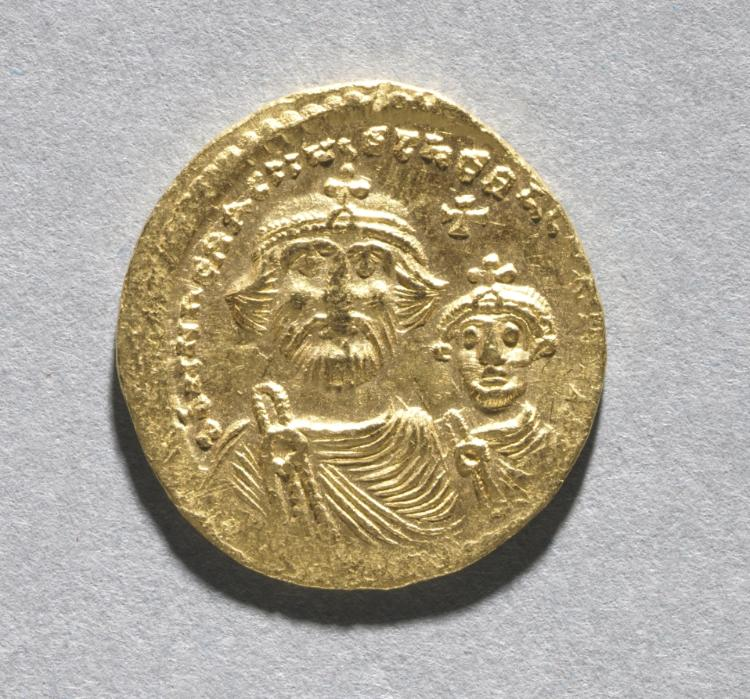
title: Solidus with Heraclius and his Son Heraclius Constantine (obverse)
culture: Byzantium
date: c. 616–625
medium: gold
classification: Coins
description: The vast number of surviving Byzantine coins attests to the level of trade across the empire. Controlled and supervised by the emperor, the producers of coins took care to represent his authority and reflect his stature. Talented artists were recruited to engrave the dies (molds) used for the striking of coins. Emperors increasingly came to include their heirs and co-emperors on their coinage, as well as other family members or even earlier rulers. Coins were recognized, then as now, as small, portable works of art. With their inscriptions and images, Byzantine coins provide valuable documentation of historical events and a record of the physical appearance of the emperors. The solidus is the basic gold coin of 24 karats; the tremissis, a gold coin of one-third the weight and value of the solidus; and the nomisma, which in the 10th century replaced the solidus as the standard gold coin.